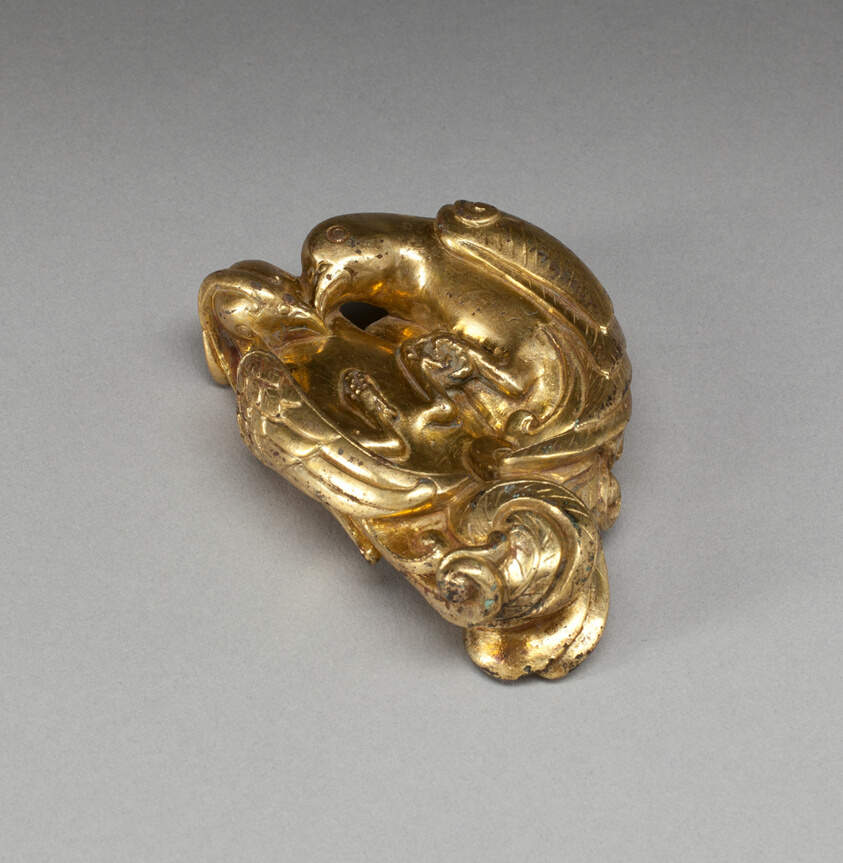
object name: Religious/Ritual Object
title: Weight in the Form of Nestled Birds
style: Chinese (culture or style)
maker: China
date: Tang dynasty, 618–907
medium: Gilt bronze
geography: China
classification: bronze; metal; decorative object/ornament; asian art; ritual objects